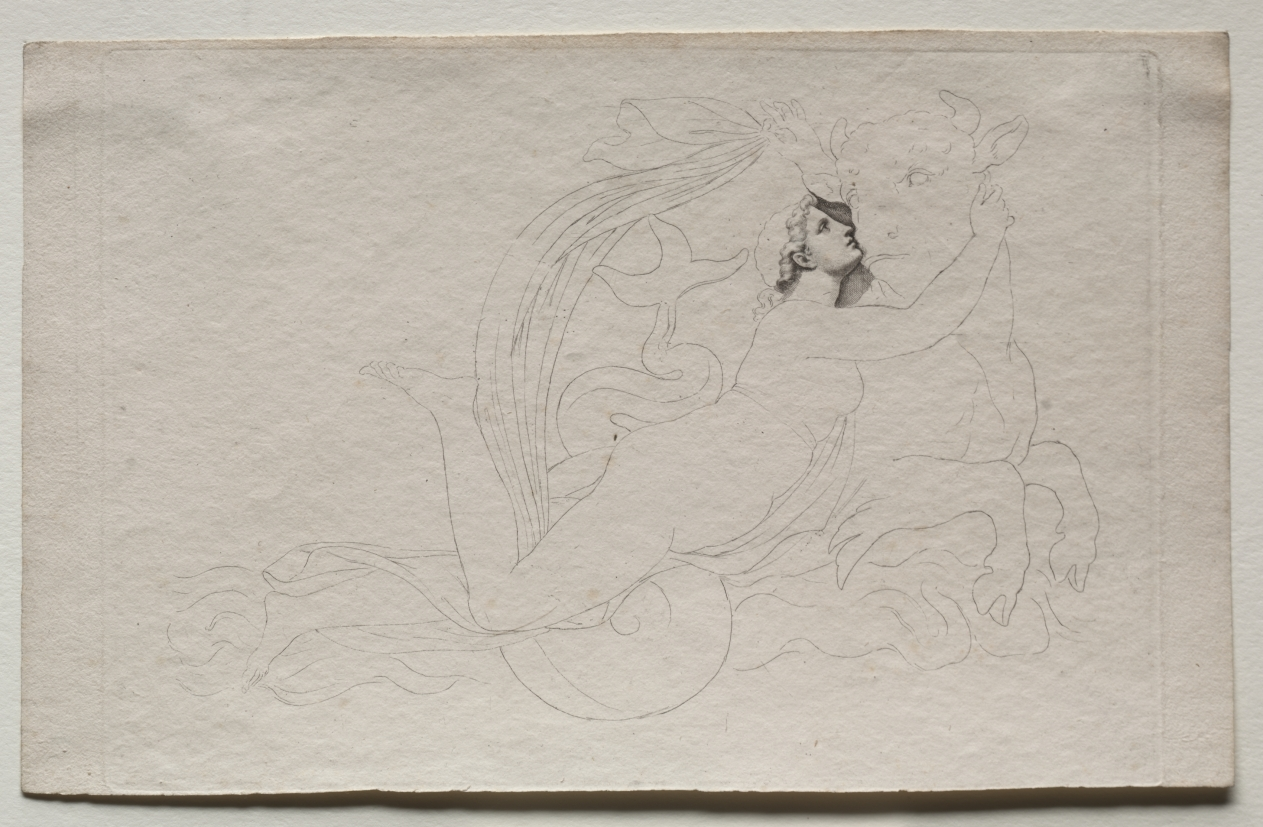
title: Rape of Europa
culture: France, early 19th Century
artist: Pierre-Paul Prud'hon (French, 1758–1823)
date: c. 1800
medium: etching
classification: Print